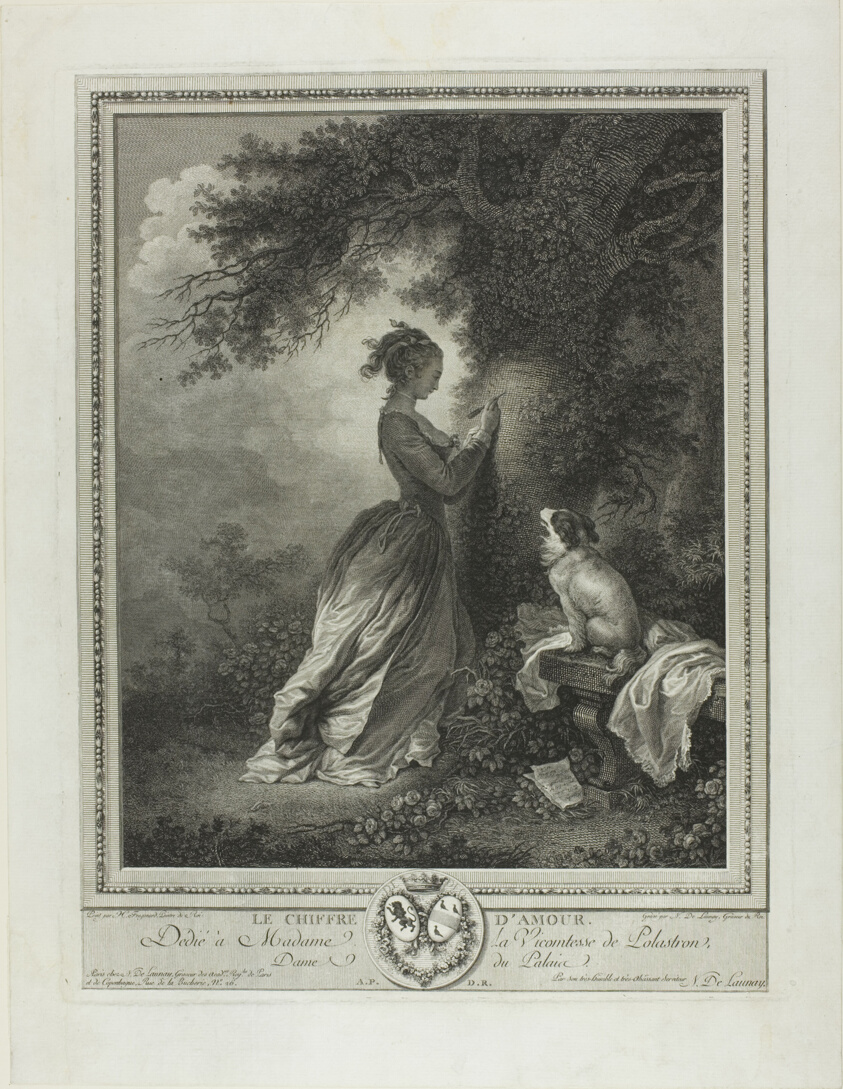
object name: Print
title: The Souvenir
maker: Nicolas Delaunay (French, 1739-1792); after Jean-Honoré Fragonard (French, 1732-1806)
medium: Engraving on ivory laid paper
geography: France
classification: etching; print; prints and drawing